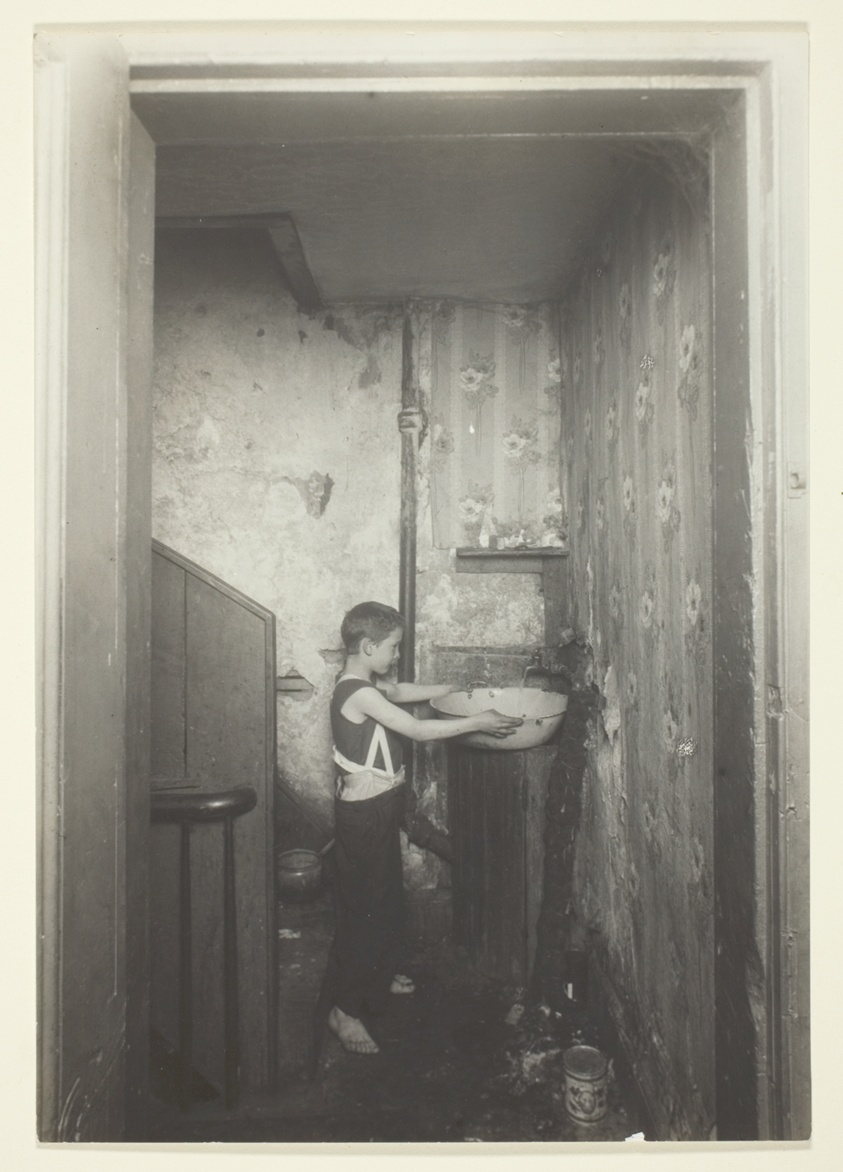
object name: Photograph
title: One Spigot to a Floor. Old-Time Tenement In New York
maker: Lewis Wickes Hine (American, 1874–1940)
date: 1912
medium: Gelatin silver print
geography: United States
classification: gelatin silver (developing-out-paper) pr; photographic process; photography; photograph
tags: Collected by Hugh Edwards, documentary